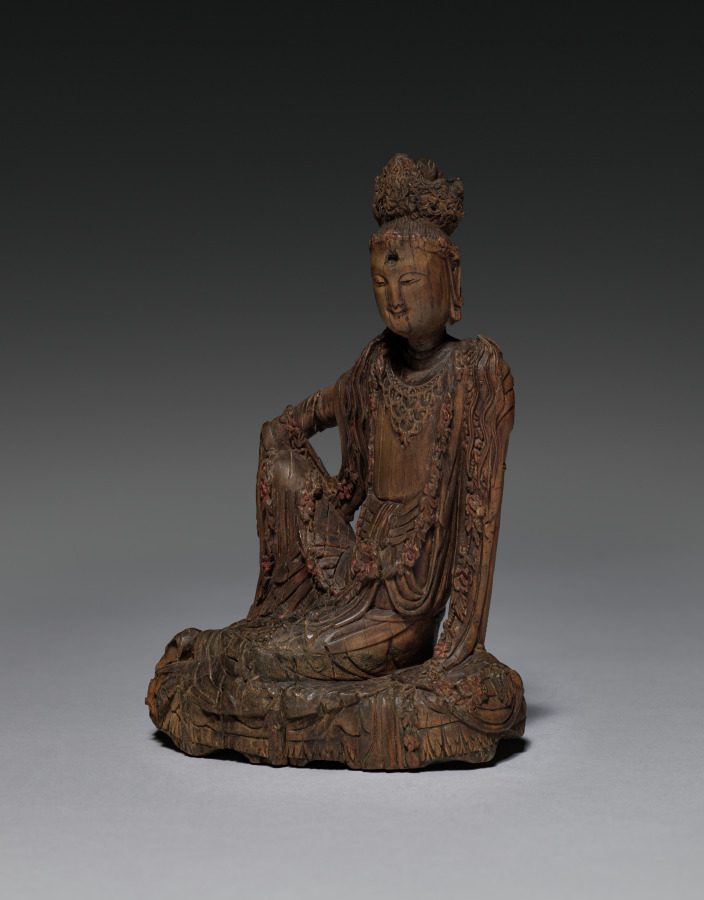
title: Potalaka Guanyin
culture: China, Five dynasties (907-960)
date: 900s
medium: Carved sandalwood with traces of paint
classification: Sculpture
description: This portable figure of Guanyin, the Bodhisattva of Compassion who vowed to stay on earth to help human beings, is carved of precious sandalwood. It is lavishly covered with garlands of flowers that retain traces of the original red paint. The small sculpture may have been used in a private devotional context.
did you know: Mount Potala is the mythical home of the bodhisattva Avalokiteśvara, called Guanyin in Chinese.